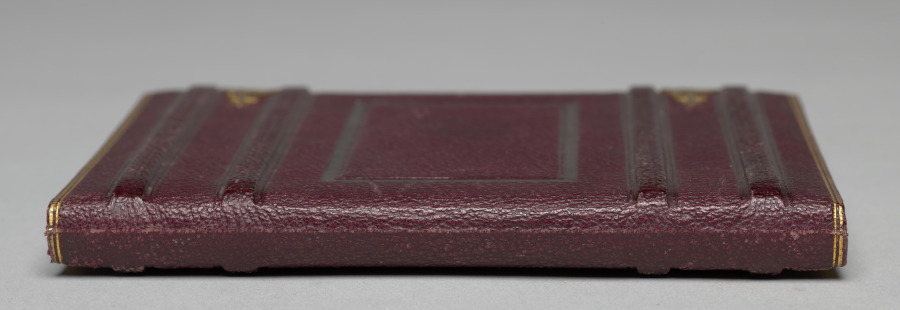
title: English family of five with marble bust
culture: England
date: 1850–65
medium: ambrotype, half plate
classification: Photograph